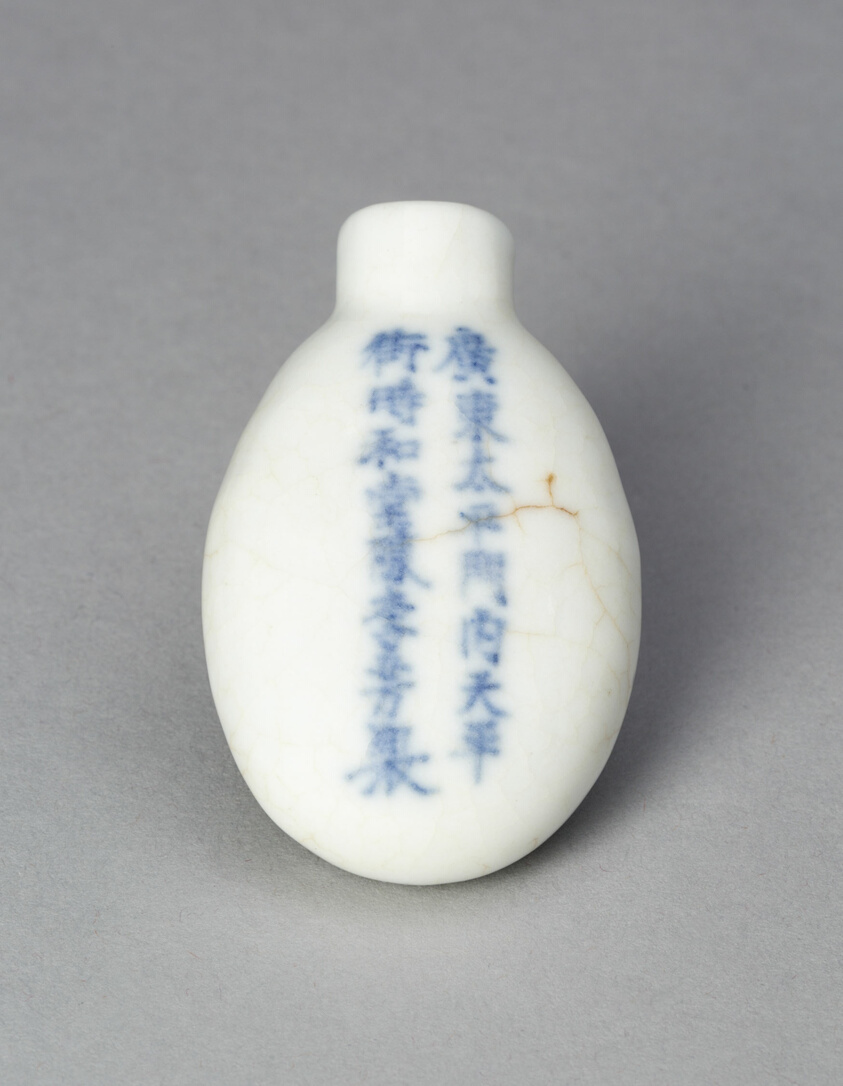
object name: Vessel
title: Snuff Bottle with Inscriptions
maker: China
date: Qing dynasty (1644–1911), 1800–1900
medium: Porcelain painted in underglaze blue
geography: China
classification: snuff bottle; porcelain; ceramics; asian art; vessel